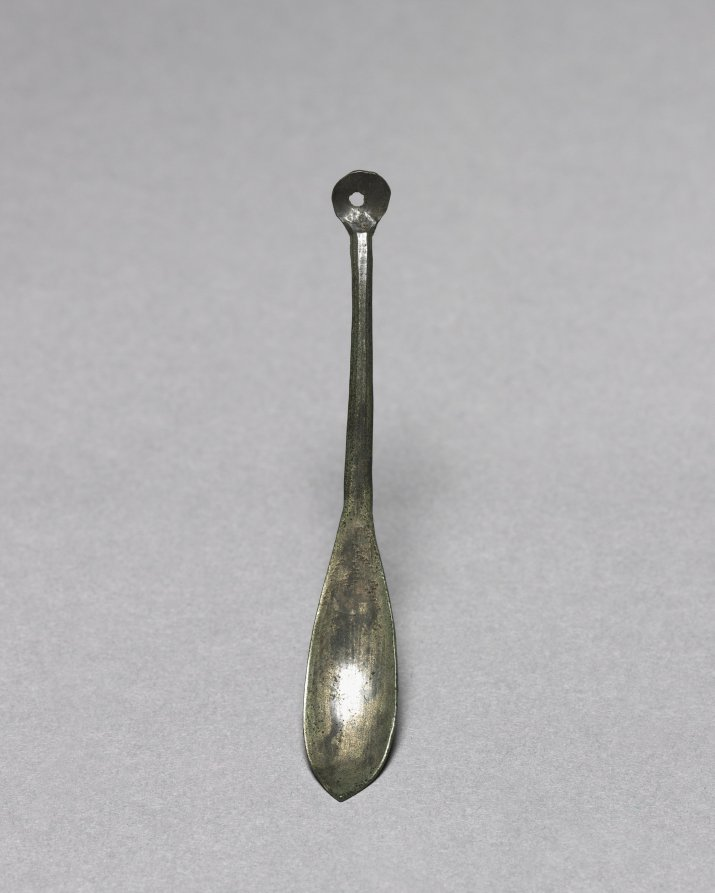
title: Spoon with Dual Heads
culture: Korea, Goryeo dynasty (918–1392)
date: 918–1392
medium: bronze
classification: Metalwork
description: This bronze spoon has dual heads: one is large, and the other small. The smaller head is believed to have been used to hold a small dose of liquid medicine.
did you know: Bronze spoons are the most common burial item. Scholars have proposed that toward the end of the 14th century, Koreans enjoyed meat-based soups more than any other dishes, explaining why spoons became common household items as well as burial goods.